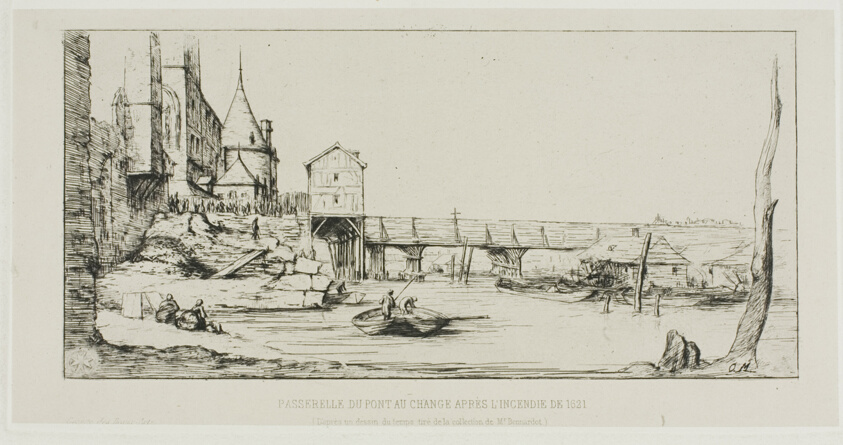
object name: Print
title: The Footbridge Temporarily Replacing the Pont-au-Change, Paris, After the Fire of 1621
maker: Charles Meryon (French, 1821-1868); after Stefano della Bella (Italian, 1610-1664)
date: 1860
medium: Etching on grayish ivory wove paper, laid down on ivory wove paper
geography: France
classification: etching; print; prints and drawing